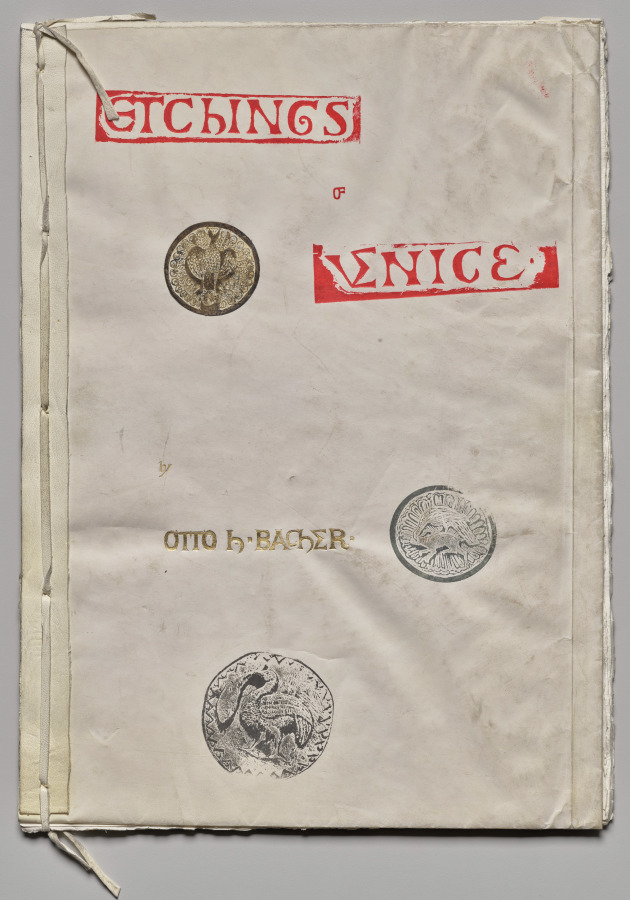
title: Etchings of Venice: Cover and Title Page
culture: America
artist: Otto H. Bacher (American, 1856–1909)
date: 1882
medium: etching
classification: Print